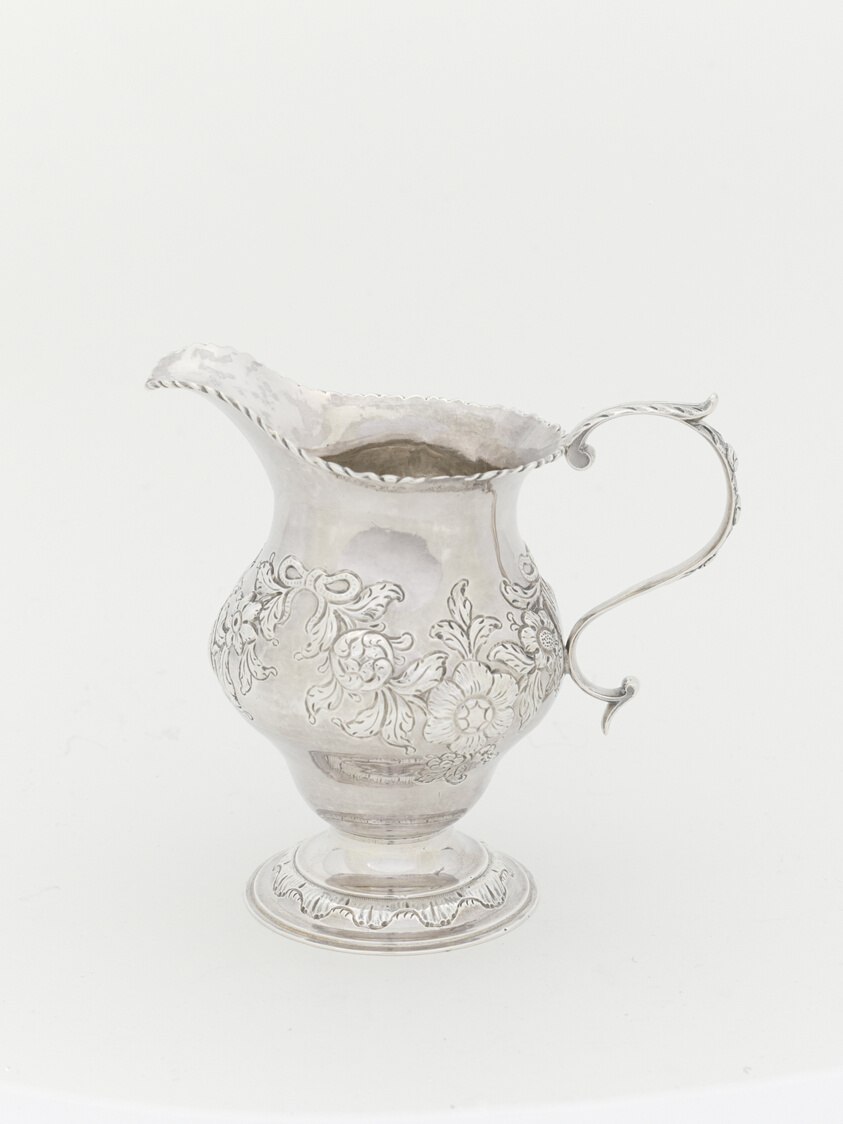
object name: Metalwork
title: Cream Pot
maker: Bancroft Woodcock; American, 1732–1817; Wilmington, Delaware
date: 1765–75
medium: Silver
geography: Wilmington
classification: creamer; silver; american decorative arts; american arts; decorative arts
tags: dining, drinking